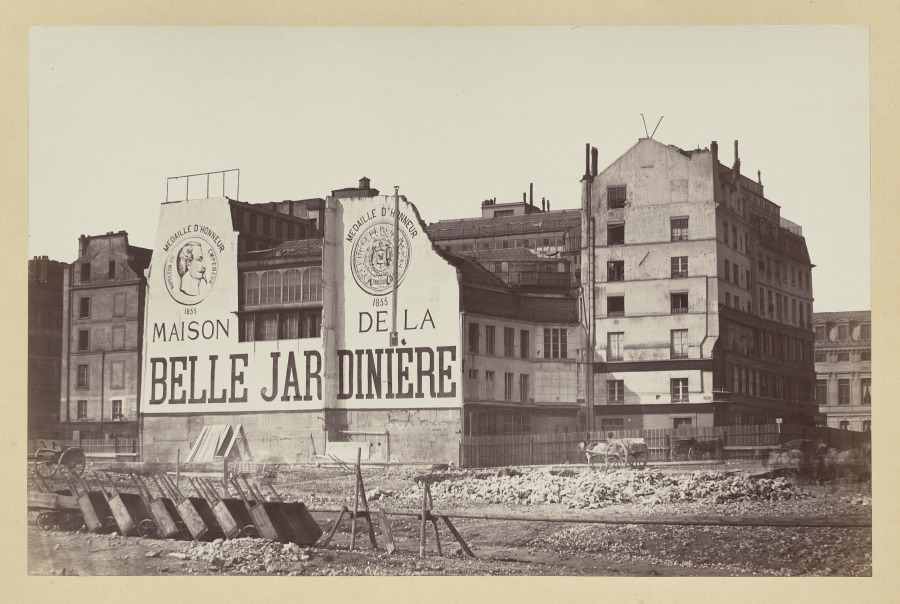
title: La Belle Jardinère: le magasin de la rue de la Cité pendant sa demolition, Paris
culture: France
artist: attributed to Charles Marville (French, 1813–1879)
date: 1864–66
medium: albumen print from collodion negative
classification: Photograph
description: In the 1850s and 1860s, Paris was transformed through a massive urban renewal program. Charles Marville photographed the demolition of the old Paris and the modern structures that replaced it. Here the old buildings of La Belle Jardinère, one of the first department stores in Paris, are being torn down to make way for a new hospital.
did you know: In the mid-1820s, the department store being demolished here introduced the idea of selling ready-to-wear clothing.